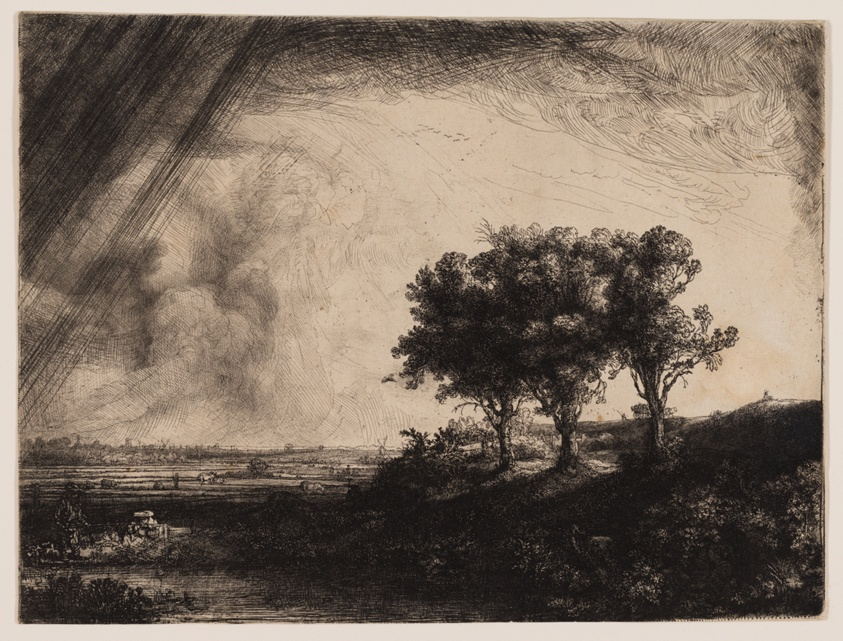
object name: Print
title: The Three Trees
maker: Rembrandt van Rijn (Dutch, 1606-1669)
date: 1643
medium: Etching and drypoint on ivory laid paper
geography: Holland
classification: etching; print; prints and drawing; paper; drypoint